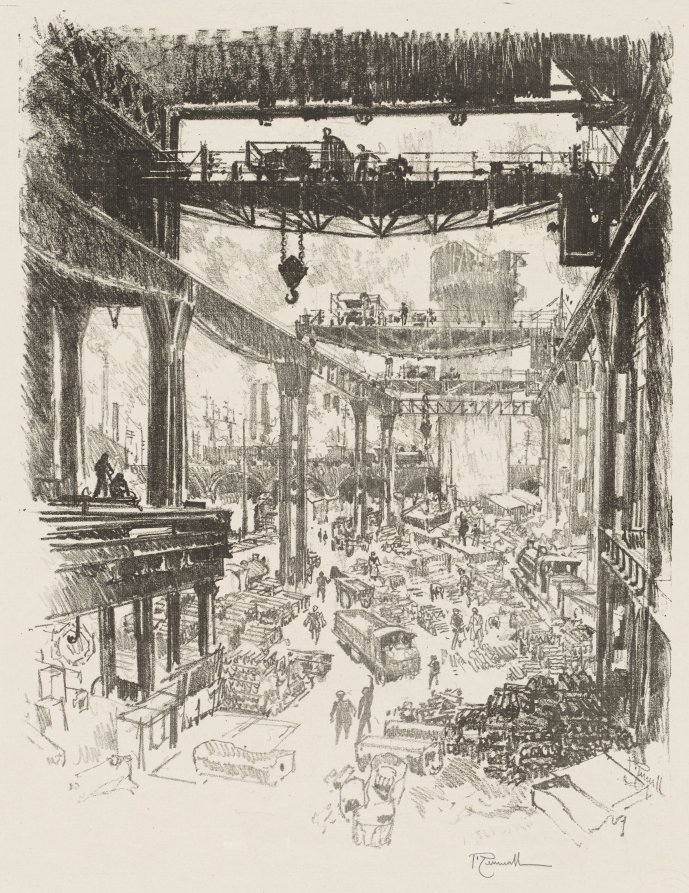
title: English War Work: The Great Tower, Pig Iron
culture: America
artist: Joseph Pennell (American, 1857–1926)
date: 1916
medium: lithograph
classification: Print